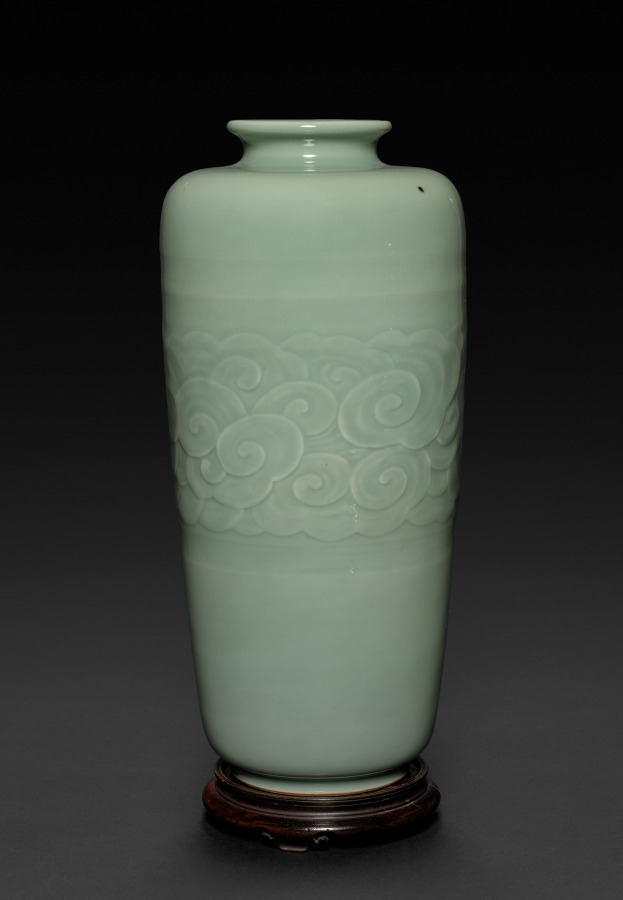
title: Tong-shaped Vase with Band of Cloud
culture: Japan, Meiji period (1868–1912)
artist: Seifū Yohei III (Japanese, 1851–1914)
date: 1893–1914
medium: Porcelain with molded and carved design and green glaze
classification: Ceramic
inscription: 清風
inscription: 帝室技芸員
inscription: 金聲玉振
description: Many of the vases created by Yohei III and IV were made with reference to and in emulation of Chinese ceramics in both form and glazing. The vessel type called tongping, pronounced tōbin in Japanese, is tall and cylindrical, like the thick length of bamboo referenced in the shape of the ideograph tong 筒. Unlike the ancient gu, hu, and guan, this form did not emerge in China until the Ming dynasty, and many such vases date to the early Qing dynasty. Two green-glazed vases, this one by Yohei III and the other by Yohei IV CMA 2022.228, are interpretations of this form. Yohei III’s version has slightly hunched shoulders and is somewhat wider at the top below the small neck and lip. Yohei IV’s vase is more angular. The wide rack of molded cloud encircling the Yohei III vase rises subtly from very low relief banding above and below it, accentuating the vessel’s rounded edges and complementing the form. In contrast, the allover flower vine pattern on the body and “seven treasures” pattern at the collar of the vase by Yohei IV evokes a garment’s cuffed sleeve, like the common English appellation for this type of vessel—“sleeve vase.”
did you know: Seifū Yohei III mined the repertoire of Chinese vessel types, from ceramics modeled after ancient ritual bronzes to shapes developed in the Yuan (1279–1368) and Ming (1368–1644) dynasties.